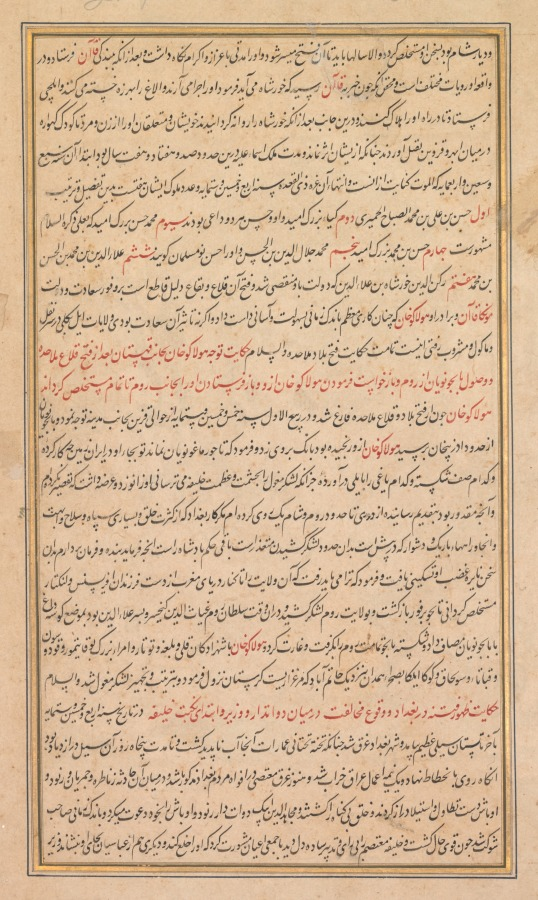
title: Hulagu Khan giving a feast and dispensing favor upon the amirs and princes, from a Chingiz-nama (Book of Chingiz Khan) of the Jami al-tavarikh (Compendium of Chronicles)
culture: Mughal India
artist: Lal (Indian, active c. 1555–1600)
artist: Dharam Das (Indian, active c. 1580–1605)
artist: Padarath (Indian, active late 1500s)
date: c. 1596–1600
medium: Gum tempera, ink, and gold on paper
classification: Painting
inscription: inscription at the base of the painting: tarih Lal 'amal-i Dharam Das tuze name cherehe Padarath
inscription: Persian inscription in top margin, in nasta‘liq script: Hulagu Khan giving a feast and dispensing favor upon the amirs and princes Persian inscription in bottom margin, in nasta‘liq script: Outline drawing by Lal, [color] work by Dharam Das, important portraits by Padarath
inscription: Verso: Text of Hulagu Khan giving a feast and dispensing favor upon the amirs and princes Persian text in nasta‘liq script: [cont. from recto] in the Land of Sham [Syria], [that] would surrender if he [Khurshah] gave the word; otherwise, it would have taken years before they could be overrun. So he [Hulagu] kept him for a while, and he was treated with respect and dignity. And then he dispatched him to the service of the Great Khan [Mongke]. And regarding his [Khurshah’s] death, there are different versions. The truth is that when news reached the Great Khan that Khurshah was on his way, he said: “Why are they bringing him [here] and tiring the packhorses to no purpose?” And he [Mongke] dispatched envoys who did away with him en route. And at this end, after Khurshah had been sent off on the road, they murdered his entire family and household on the road between Abhar and Qazvin, including men, women, and infants still in their cradles, so that not a trace of them was left. And the duration of the rule of the Ismailis in these regions is around one hundred and seventy-seven years, starting from the year four hundred and seventy-seven [AD 1084], and the word “Alamut” is its chronogram. It ended on the first of Dh’ul Qa’da 654 [20 November 1256]. And the number of their rulers is seven, in this manner and sequence: first, Hasan son of Ali son of Muhammad al-Sabbah al-Hamayri; second, Kiya Buzug Ummid, and he and Hasan [the first ruler listed] were both Ismaili missionaries; third, Muhammad Hasan Buzurg Ummid, who is known as ‘Ala dhhkirhi’l-Salam; fourth, Hasan son of Muhammad Buzurg Ummid; fifth, Muhammad Jalal al-Din son of Hasan and they call him Hasan the New Musulman; sixth, ‘Ala al-Din son of Muhammad son of al-Hasan son of Muhammad; seventh, Rukn al-Din Khurshah son of ‘Ala al-Din, in whose time the dynasty fell. And the conquest of those fortresses and edifices is finite proof of the plenitude of the good fortune of Mongke Khan and his brother Hulagu Khan, who managed to accomplish such a momentous task in such a short span of time with such ease and facility; for had it not been for that good fortune, the conquered domains would have been ruined, faced with the difficulties of providing and transporting provisions and drink. These are the events and accounts of the conquest of the lands of the Ismaili heretics, as mentioned above. Finis. The narrative of Hulagu Khan turning toward Kohistan after the capture of the heretics’ fortresses and receiving Bayju Noyan from Anatolia and his interrogation by Hulagu Khan and his dispatch again to Anatolia to complete the conquest Hulagu Khan, when he had completed the conquest of the citadels and lands of the [Ismaili] heretics, in Rabi‘ al-awwal of the year 655 [AD 1257] from the region of Qazvin, proceeded toward Hamadan. And Bayju Noyan arrived from the direction of Azerbaijan. Hulagu Khan was upset with him and shouted at him saying, “Since the passing of Churmaghun Noyan, what have you done in the Land of Iran, and which army have you defeated, and which rebel have you managed to bring into obedience, aside from instilling fear into the Mongol army with accounts of the caliph’s might and grandeur?” He [Bayju] knelt down and said: “I committed no wrong, but did what I could as presented to you. I have subjugated the land from the gates of Rayy to the borders of Anatolia and Syria, all save the matter of Baghdad. It is difficult to take the army there given the difficult roads ahead, the heavy population, and their vast army and arms. It is for the mighty ruler [padshah] to decide and I will obey whatever he decrees.” These words alleviated his [Hulagu’s] anger and he decreed thus: “You must go and conquer lands as far as the shores of the western sea from the hands of the sons of Efrins and Lanktar.” Bayju returned at once and took an army to Anatolia; and at that time the sultan of Anatolia, Ghiyath al-Din Kai-Khusrau son of ‘Ala al-Din, met Bayju Noyan in battle at Kusa Dagh and was defeated. And Bayju conquered the whole of Anatolia and indulged in plunder. And Hulagu Khan accompanied by princes Ghuli and Balagha and Tutar and chief commanders Buqa Timur and Qudusun and Qata and Sunjaq and Kuka Ilgai, camped in the Hamadan plain near Hatimabad, which is a meadow with tamarisk trees, and began to prepare and arrange the troops. Finis. The emergence of tumult in Baghdad and the discord between the chief secretary and the vizier and the beginning of the caliph of Baghdad’s demise In the year 654 [AD 1256] at the end of the summer, a great flood came down and inundated the city of Baghdad in such a way that the lower part of the buildings there were submerged in water and disappeared, and for fifty days the flood was on the rise, and then it began to subside, and half of the habitations in Iraq were destroyed, and to date the Musta‘sami Flood is remembered as a byword [for a damaging flood] among the people of Baghdad. And in the midst of this catastrophic event, the rabble, ruffians, and misfits embarked on looting and gained the upper hand and every day killed a lot of people. And Mujahid al-Din Aybek, the chief secretary, gathered the rabble and the misfits around himself and in a short space of time built up a power base, and when he felt empowered and saw that Caliph Musta‘sam was indecisive and naive in judgment, he consulted with some of the notables in order to oust him from his position and place another Abbasid in his place, and vizier . . .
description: Seated on a lapis-blue floral carpet is Chingiz (Genghis) Khan’s grandson, who ruled Iran from 1256 to 1265. This painting is from an illustrated copy of the history of Chingiz Khan and his family that the Mughal emperor Akbar commissioned toward the end of the latter’s life. Mughal is the Persian word for Mongol, and Akbar traced direct genealogical descent from Chingiz Khan on his mother’s side. The nomadic Mongols created court settings using portable platforms and elegant carpets and tents. Multilevel canopies of imperial crimson mark the position of the khan, which means “ruler” in Mongolian.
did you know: Mongol rulers were identified by the five-feathered crown.